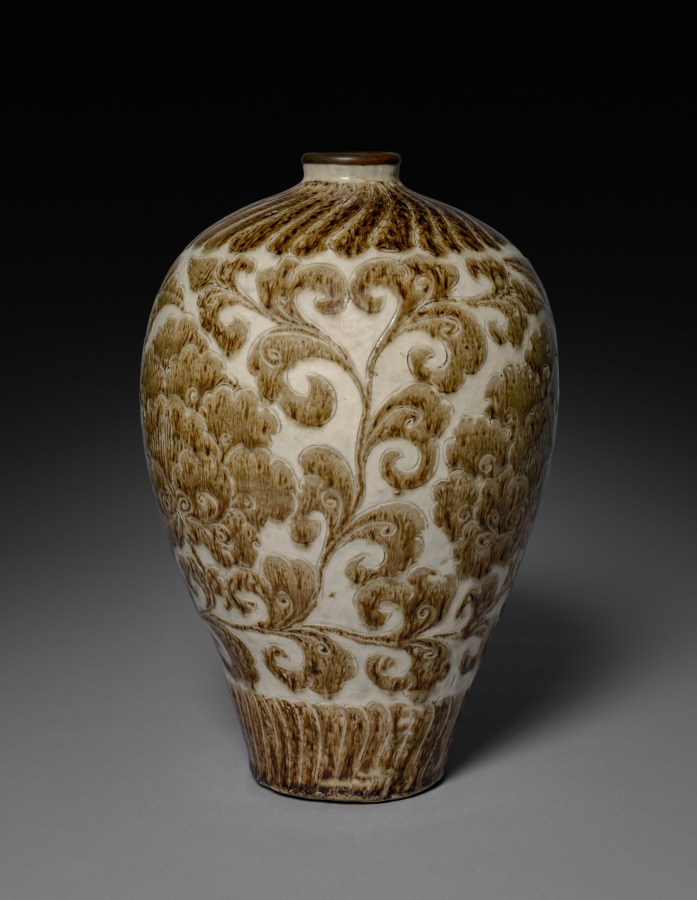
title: Meiping Vase: Cizhou Ware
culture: China, Northern Song dynasty (960-1127)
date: 1100s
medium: Buff stoneware with carved underglaze slip decoration, Cizhou ware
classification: Ceramic